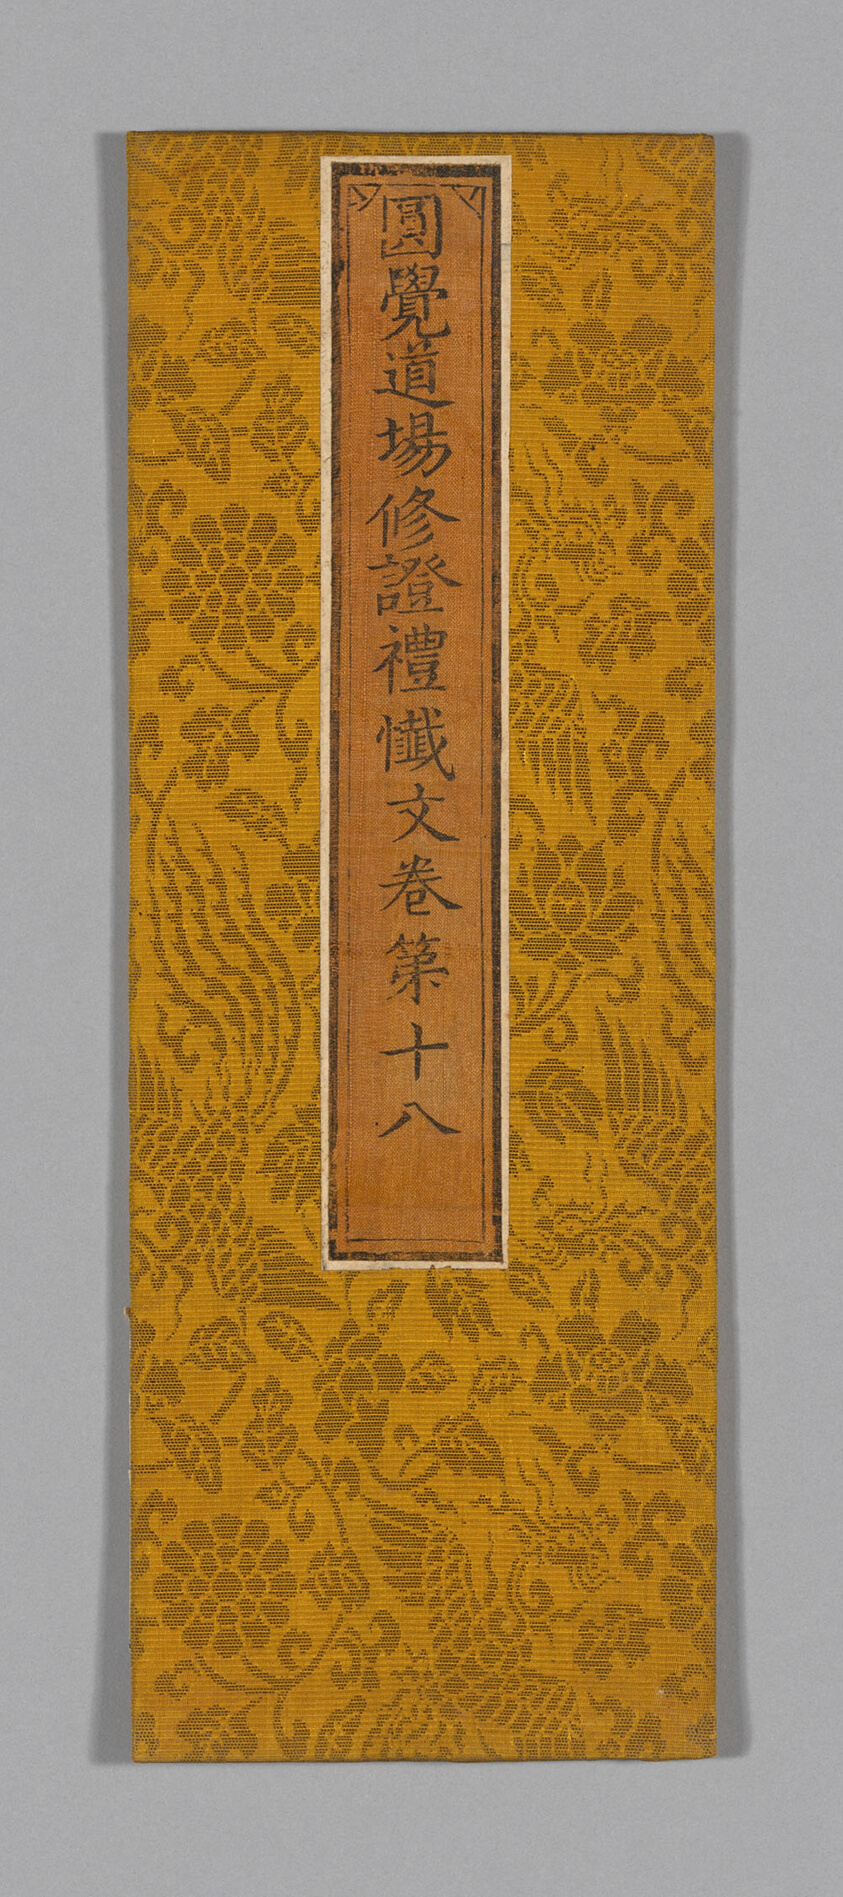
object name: Textile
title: Sutra Cover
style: ming, Chinese (culture or style), East Asian, asian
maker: China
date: Ming dynasty (1368–1644), c. 1590's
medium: Silk, gauze weave with supplementary patterning wefts; label: silk, plain weave; painted with ink; glued over paper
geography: China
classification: textile; weaving